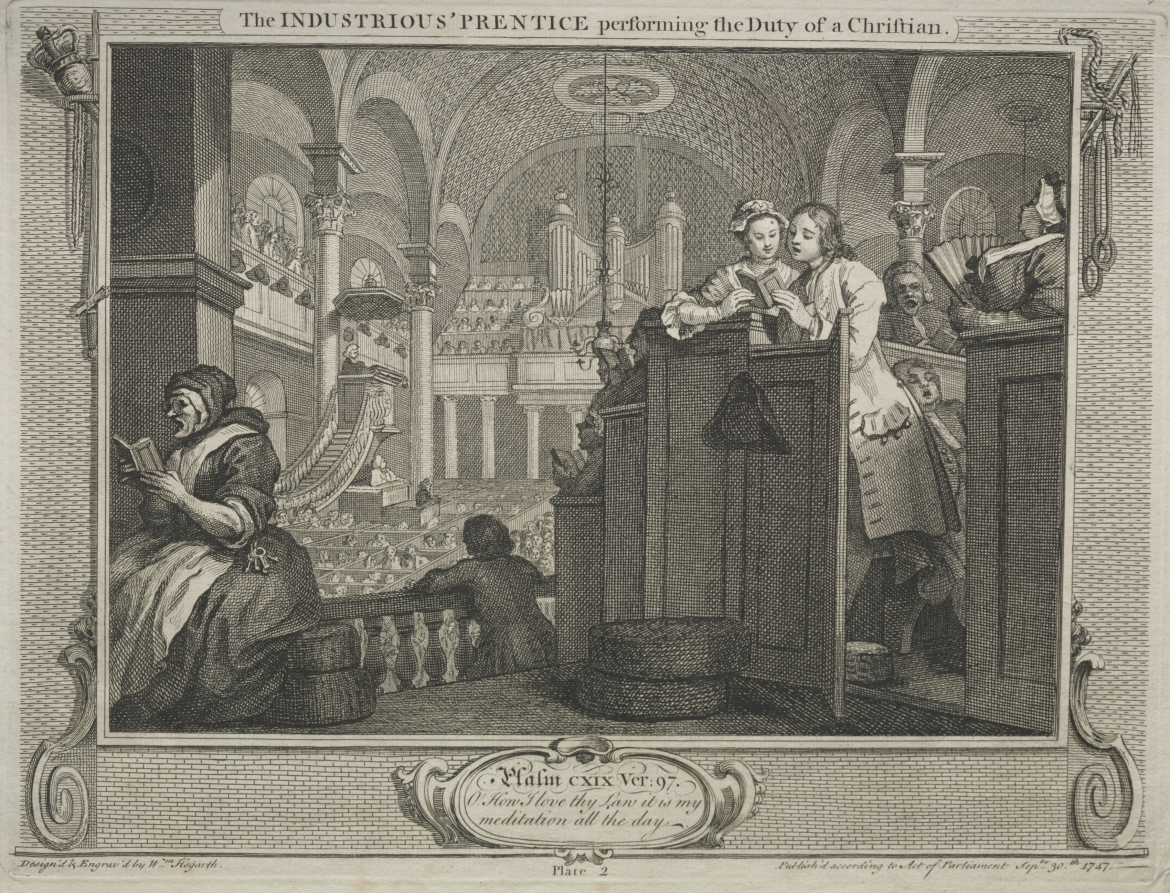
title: Industry and Idleness: The Industrious Prentice Performing the Duty of a Christian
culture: England, 18th century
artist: William Hogarth (British, 1697–1764)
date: 1747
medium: etching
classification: Print